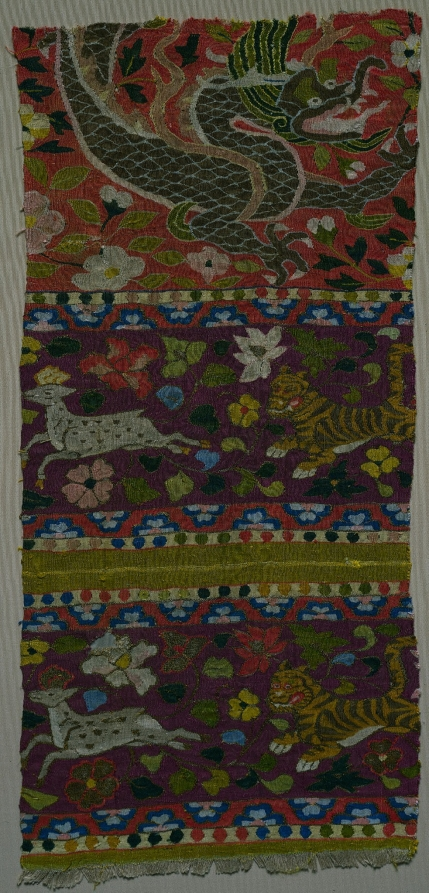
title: Tigers Chasing Deer, with Dragon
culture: China, Eastern, 11th-12th century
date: 1000s–1200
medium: Silk and gold thread; tapestry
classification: Textile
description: This reversible tapestry (kesi) fragment woven with silk and metal thread is a section from yardage likely intended for a garment, but no contemporary paintings exist to confirm this. The starting, bottom edge of the textile is preserved which indicates the bands at the base would have been the cuff ends of a garment. The design motifs of this kesi—a dragon at the top, bands of pearls and split palmettes, and tigers chasing deer with mushroom-shaped antlers—are a synthesis of Western and Chinese elements. The pearls, palmettes, and deer motifs originated in Iran and Sogdiana (an area east of the Caspian Sea and northwest of the Himalayas) but migrated east to China during the Tang dynasty (618–907). Although these motifs disappeared from Chinese art after the fall of the Tang, they survived in Central Asia. In contrast, the dragon is Chinese in origin, but here has a Central Asian form (particularly its extended snout).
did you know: Two similar kesi in Cleveland’s collection include 1991.3 and 1988.33. All are roughly the same size and given their size all three rectangular fragments may have been used as sutra (prayer leaves) covers. All three have two vertical crease lines that divide the fragment roughly into thirds and differential fading between the central third and outer thirds, which further substantiates this possible usage.